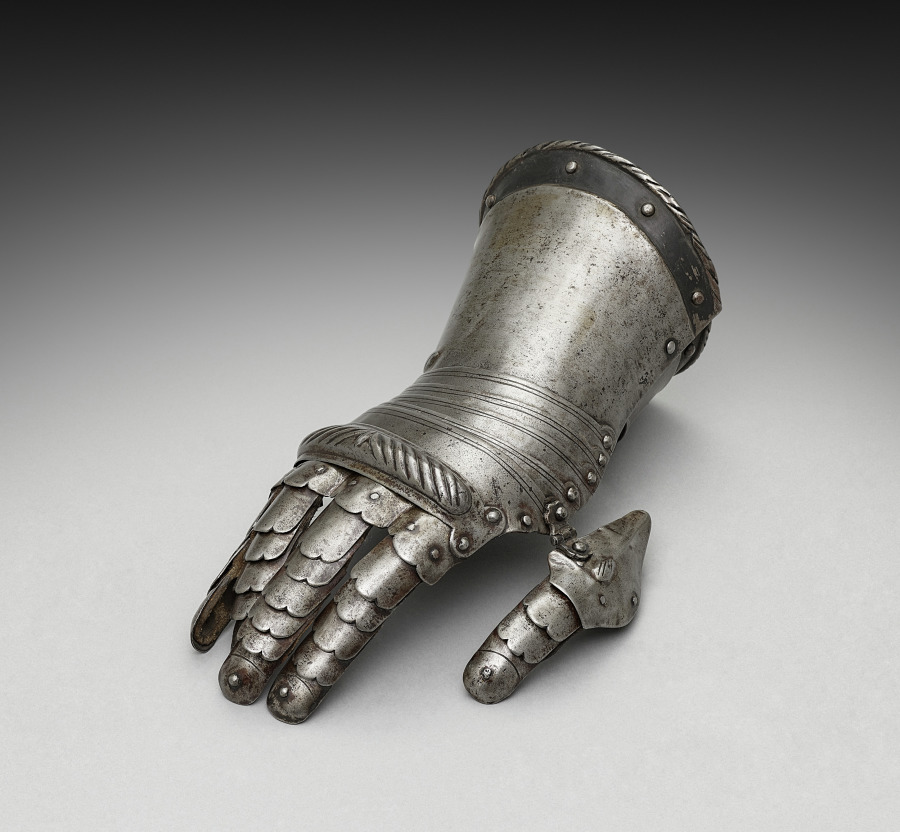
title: Right Gauntlet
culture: Germany, 19th century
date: 1801–1900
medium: steel with black paint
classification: Arms and Armor